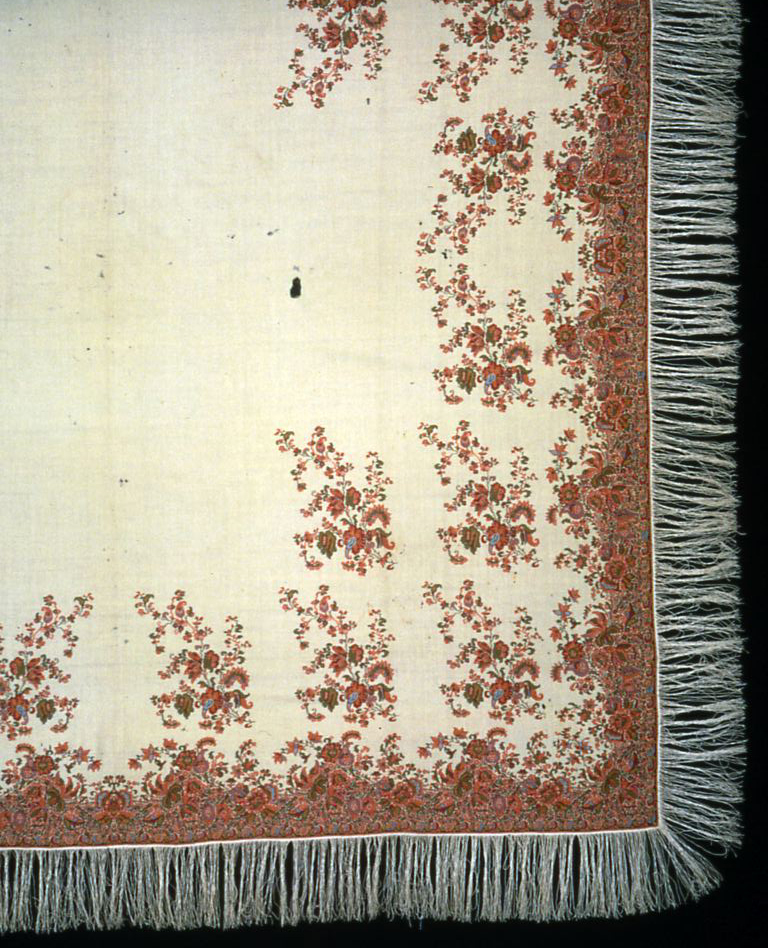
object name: Textile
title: Square Shawl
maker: England, Norwich, or Scotland, Edinburgh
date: 1840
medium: Wool, silk, and cotton, center of weft-float faced 1:3 'Z' twill weave; patterned areas of warp-float faced 3:1 'Z' twill weave with supplementary patterning wefts bound in weft-float faced 1:3 'Z' twill interlacings; attached silk, warp-faced weft ribbed plain weave extended ground weft fringe; two selvages present; woven on loom with Jacquard attachment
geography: England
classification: textile; weaving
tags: floral arrangements